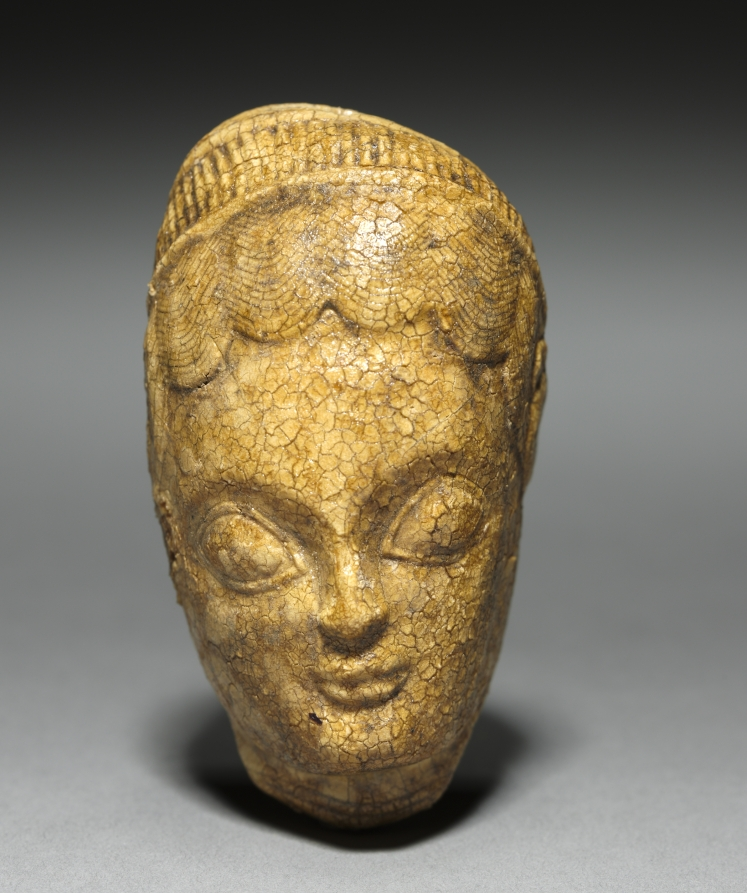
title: Head of a Woman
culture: Italy, Etruscan, "Italic"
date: 600s BCE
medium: amber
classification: Sculpture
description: Amber, a form of fossilized tree resin, was much prized in the ancient Mediterranean world, perhaps due to its mysterious luminosity, fragrance, and magnetism. It was often carved into figures or heads of humans, animals, or mythical creatures. Small perforations on this head suggest that it may once have been mounted, perhaps for use as a pendant. Although now opaque and crackled due to age, in antiquity the surface probably exhibited some degree of translucence, a valued attribute for amulets and ornaments.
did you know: Amber is fossilized ancient tree sap, often imported from the Baltic to the Mediterranean region.